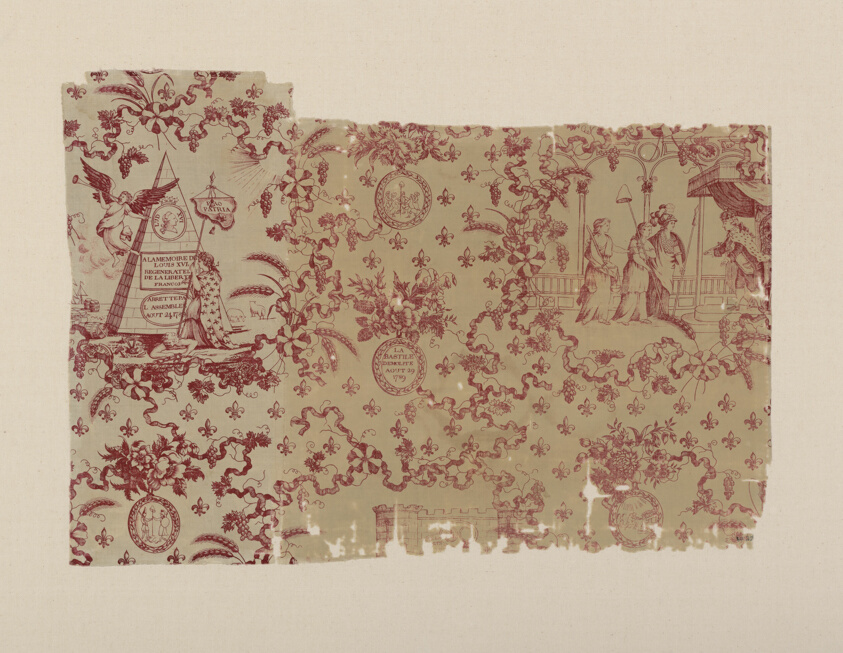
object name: Textile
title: Le Bastille Demolité (Fall of the Bastille) (Furnishing Fabric)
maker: England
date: c. 1790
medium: Cotton, plain weave; copperplate printed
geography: England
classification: textile; weaving - printed; furnishing textile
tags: propaganda